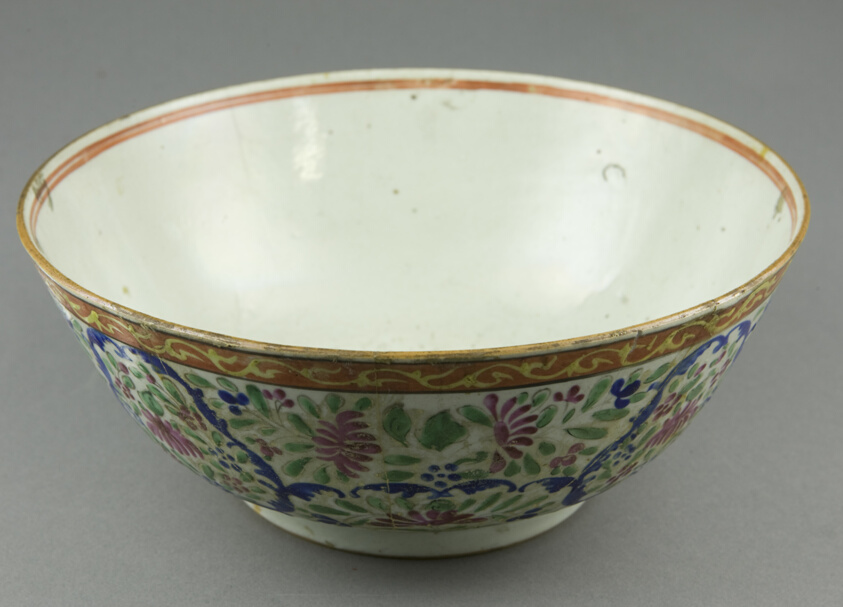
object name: Decorative Arts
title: Bencharong (Five-Colored) Ware, Bowl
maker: China, for the Thai Market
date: 19th century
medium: Porcelain painted in overglaze polychrome enamels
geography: China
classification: porcelain; asian art; ceramics; decorative arts